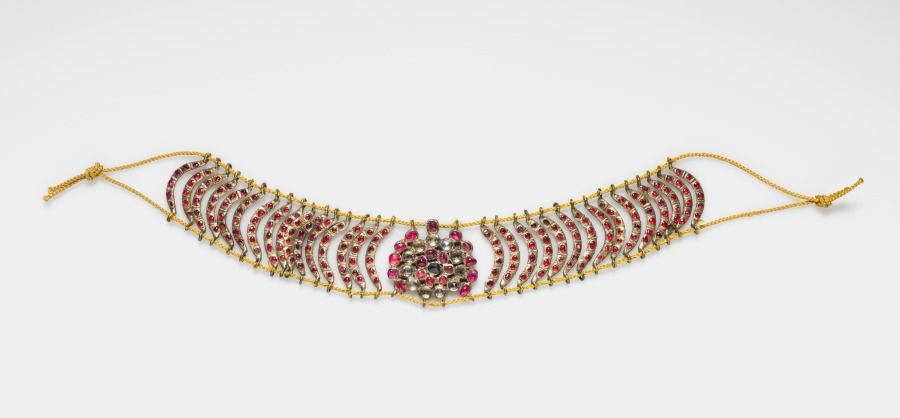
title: Armlet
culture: India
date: 1800s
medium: silver gilt with red and white stones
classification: Jewelry